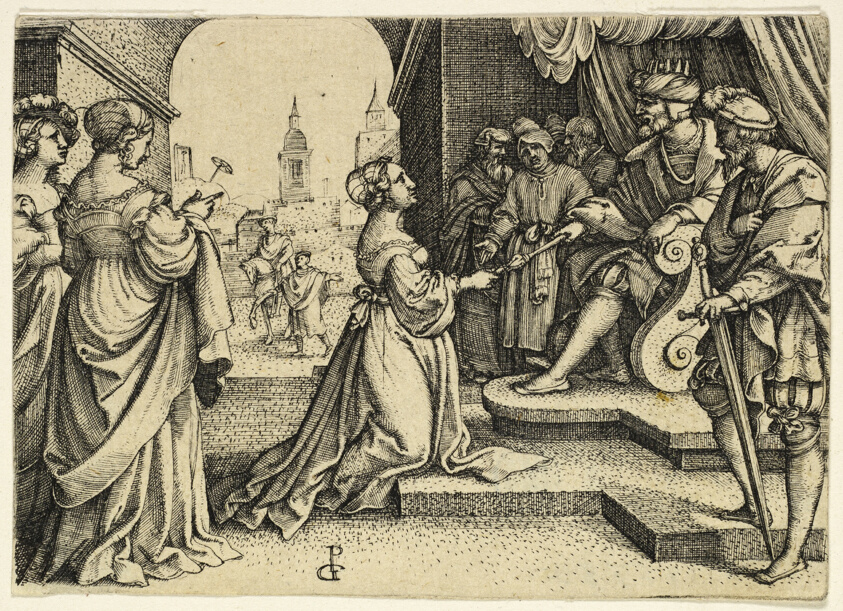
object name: Print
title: Esther before Ahasuerus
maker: Georg Pencz (German, c. 1500-1550)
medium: Engraving in black on paper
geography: Germany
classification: engraving; print; prints and drawing